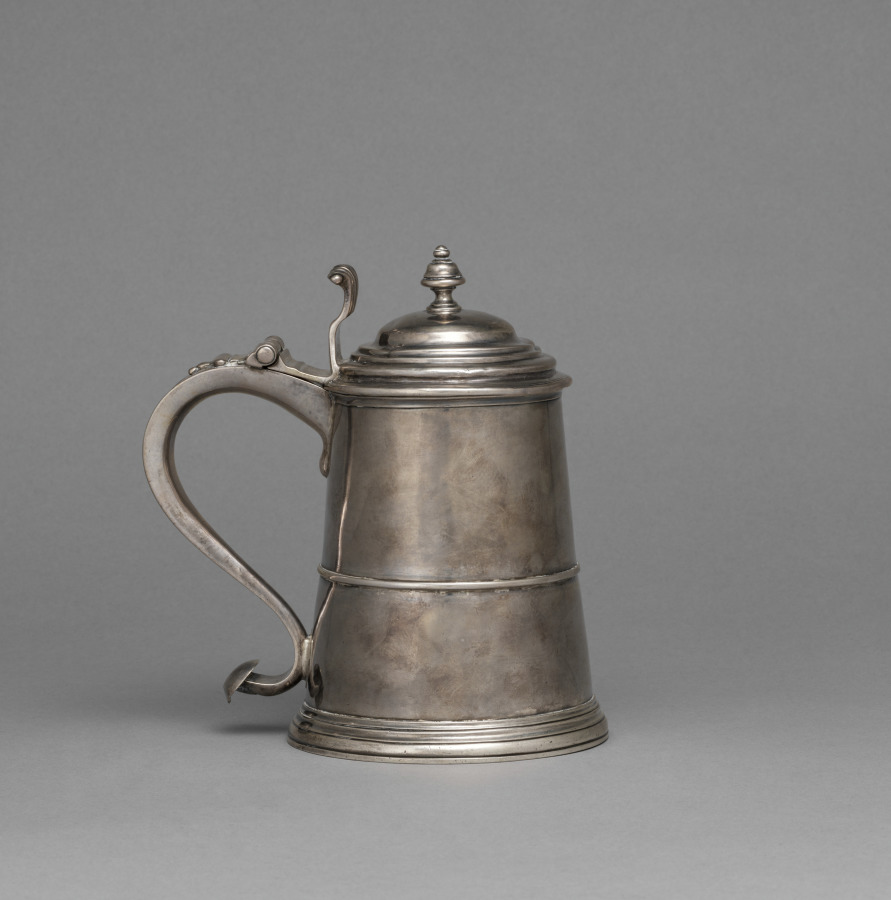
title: Tankard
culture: America, Massachusetts, Plymouth, 18th century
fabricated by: Ephraim Cobb (American, 1708–1775/77)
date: c. 1730–1740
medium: silver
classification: Silver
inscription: engraved "A * L" in block letters on top of handle, and "Anna Leonard" on bottom.